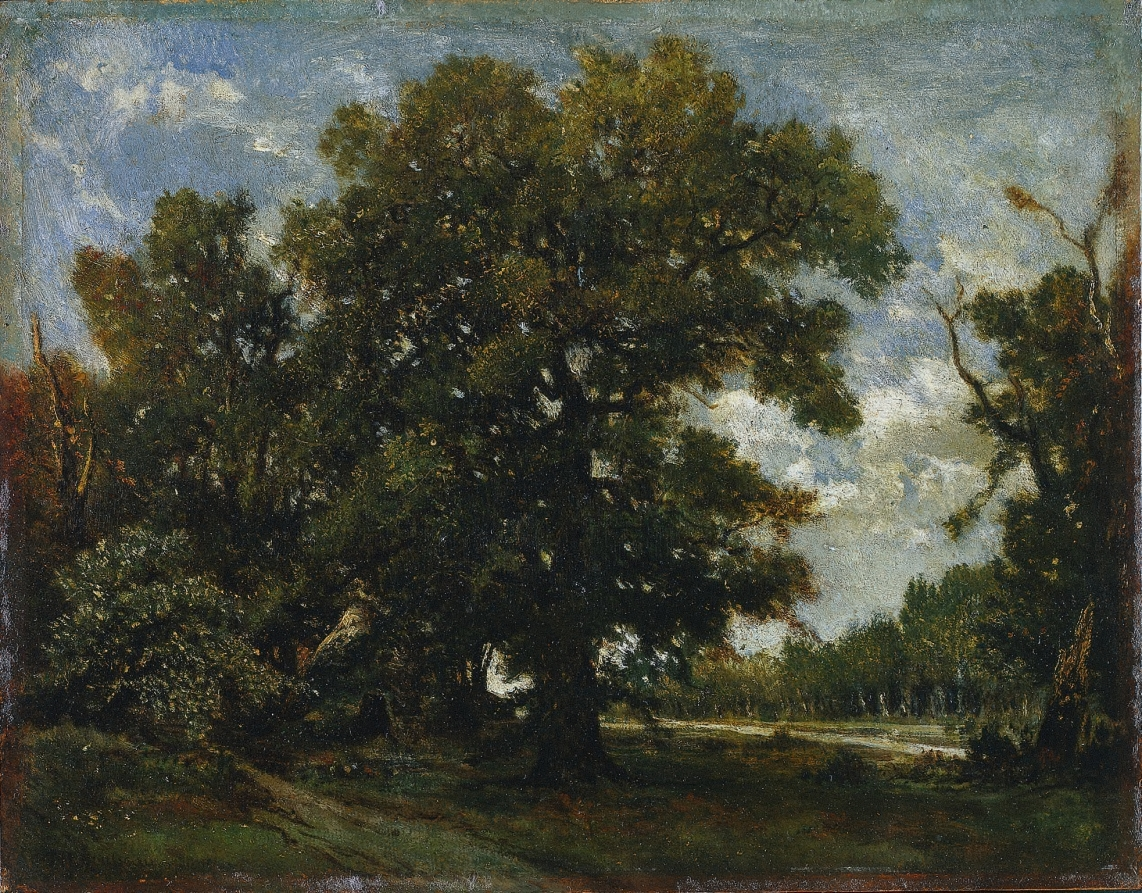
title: The Oak Tree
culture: France, 19th century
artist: imitator of Théodore Rousseau (French, 1812–1867)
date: 19th century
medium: oil on paper mounted on wood panel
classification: Painting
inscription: Signed lower left: TH. Rousseau